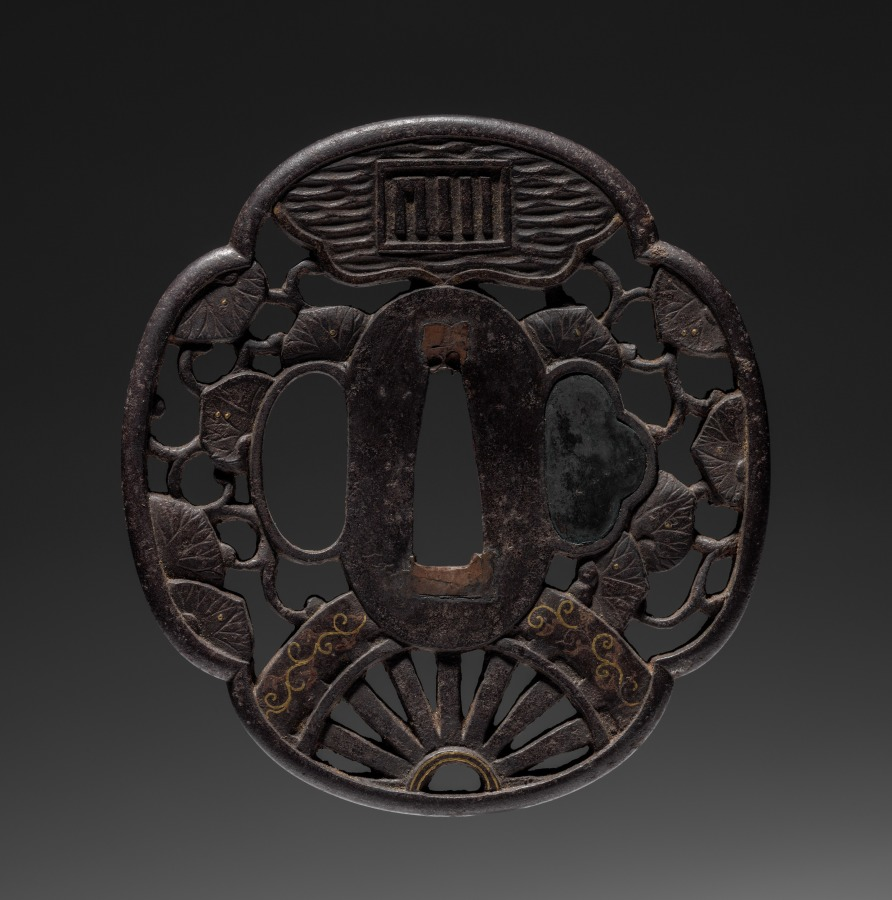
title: Sword Guard (Tsuba) with Aoi (Heartvine) Chapter of The Tale of Genji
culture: Japan, possibly Edo period (1615-1868)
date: c. 1615–1868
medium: iron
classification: Arms and Armor